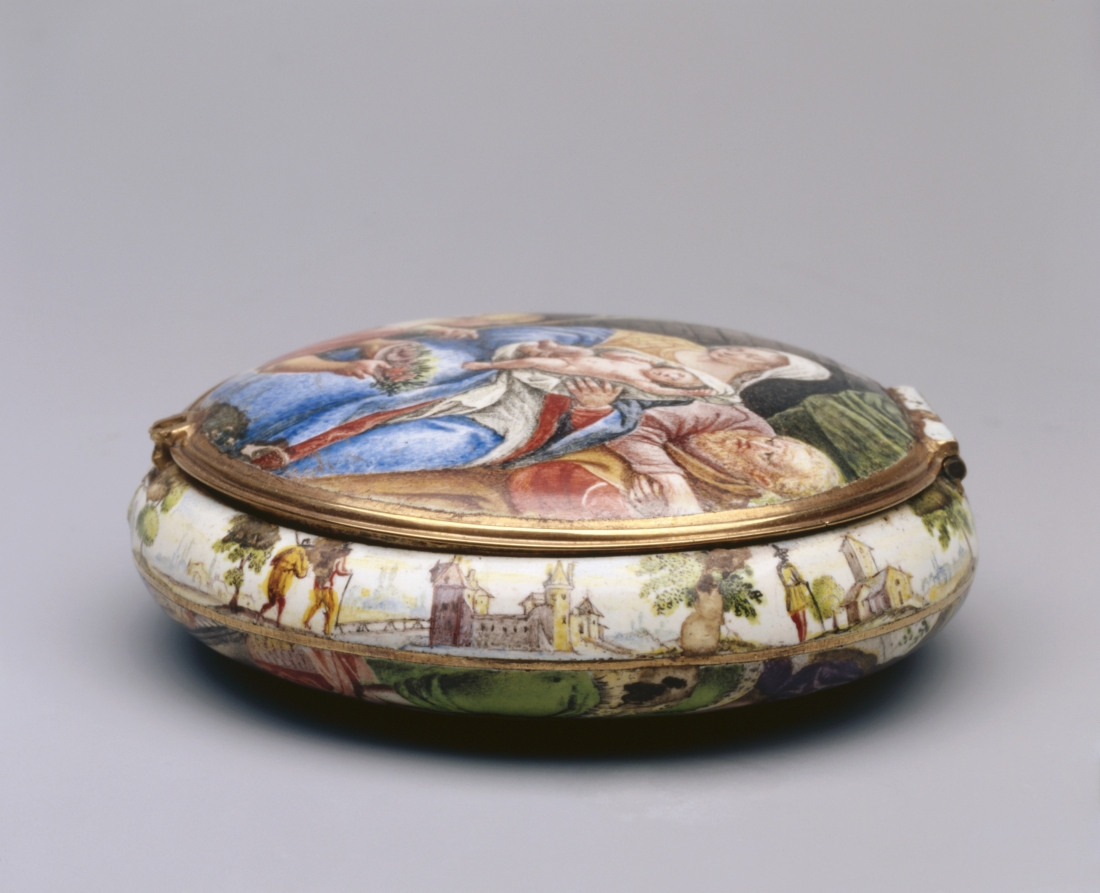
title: Watchcase (Boîtier de montre)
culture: France, 17th century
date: c. 1640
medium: gold and enamel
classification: Jewelry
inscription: [engraved on the rim]: "B8"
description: In the 1630s, the practice of painting with enamel on metal became a means for French miniature painters to achieve a more richly colored, durable product. Previously miniatures were painted with watercolor on vellum, a material made from animal skin. This case would have originally held a watch, but was later transformed into a simple box through the removal of the watch mechanism and ring. This watch case is richly painted inside and out with miniatures modeled after well-known religiously allegorical works.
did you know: Inspiration for the box’s miniatures was drawn from works by Peter Paul Rubens’ The Holy Family with Saints John the Baptist and Elizabeth (1615) (back panel) and Nicolas Cochin (interior base).